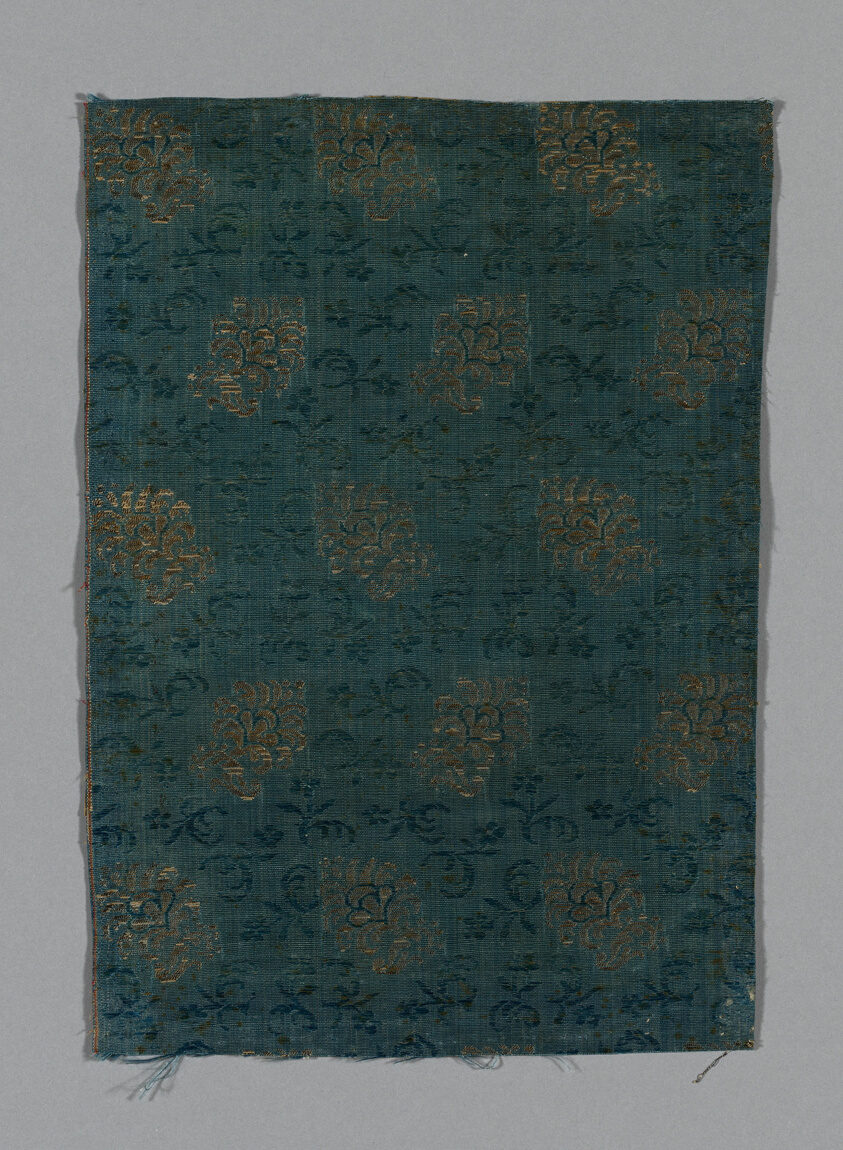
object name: Textile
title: Fragment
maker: Italy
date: 1650/1700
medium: Brocaded silk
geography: Italy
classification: textile; weaving